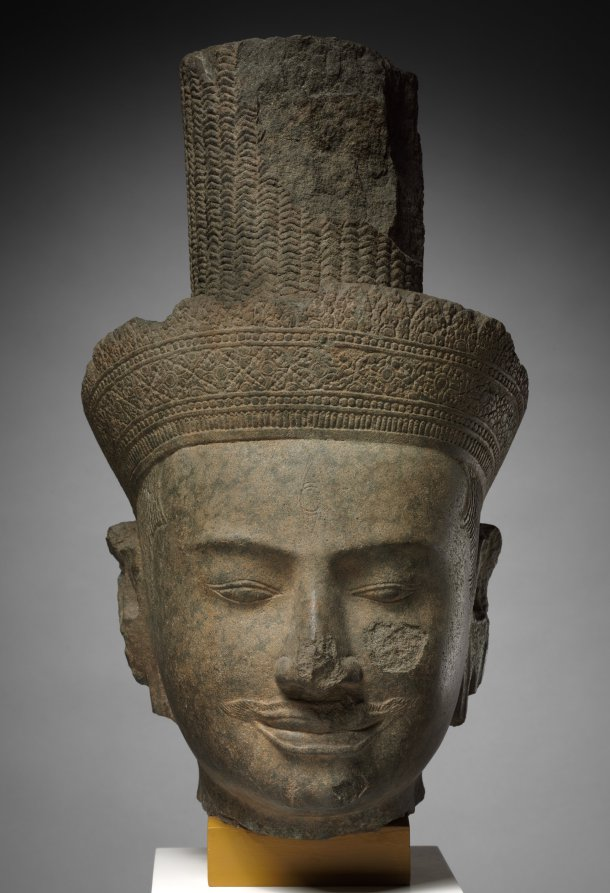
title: Head of Shiva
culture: Cambodia, Angkor, 12th century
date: 1100s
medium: sandstone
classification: Sculpture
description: Khmer patrons and artists produced works of art that could depict either a deified king or a god who has royal attributes. The Khmer cult of the god-king allowed for such fluidity of interpretation. Presence of a third eye in the forehead and matted locks of hair are attributes both of the Hindu god Shiva and the followers who emulated him in order to get closer to him.